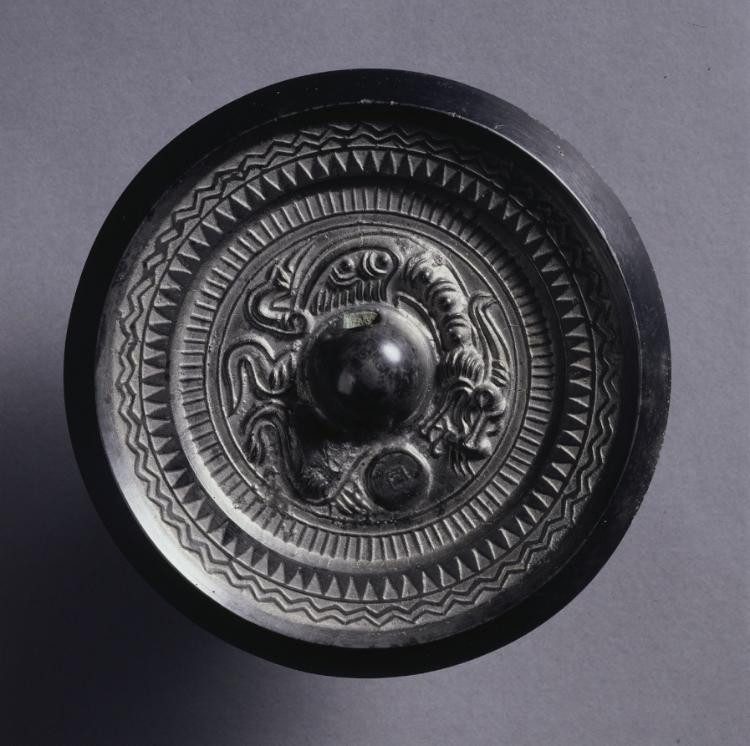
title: Mirror with a Coiling Dragon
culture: China, Three Kingdoms (221–280 CE)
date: 200s CE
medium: bronze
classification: Metalwork